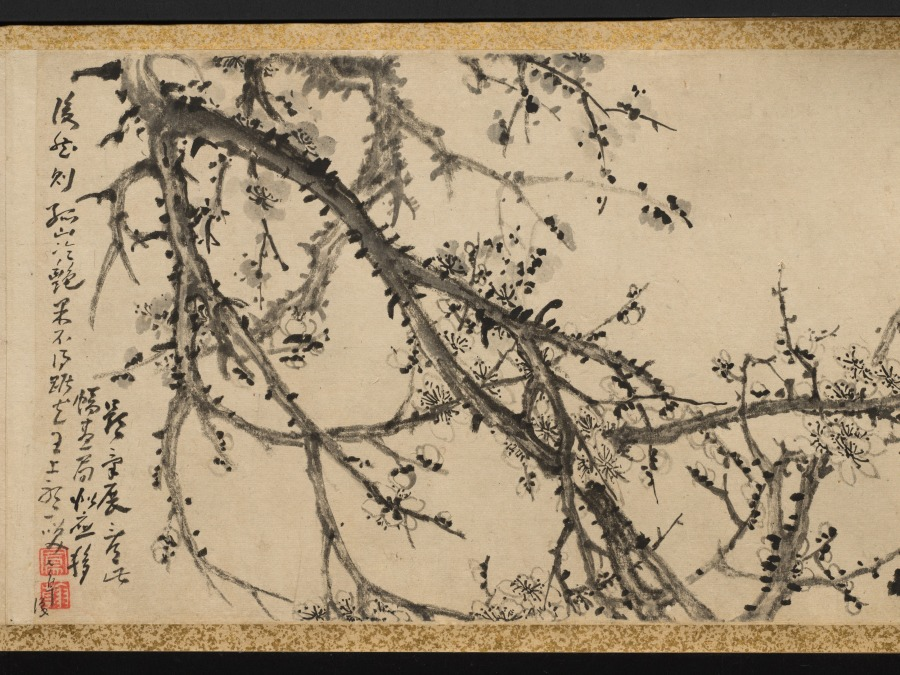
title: Plum Blossoms and Peonies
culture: China, Qing dynasty (1644-1911)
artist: Gao Fenghan (Chinese, 1683–1749)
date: 1741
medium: handscroll, ink on paper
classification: Painting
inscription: Artist's 2 inscriptions and 9 seals (the painting of Peonies with the artist's colophon and the colophon by Hou Chia-fan are on a single sheet of paper). Artist's inscription and 2 seals (Plum Blossoms): [seal] Ts'ai-yün. After finishing writing my colophon, I unrolled the painting to take another look, and it now seems that the composition here should have moved to the later part of the scroll. If that is the case, then the "Cool Beauty" [prunus] of the Solitary Hill is after all unable to take precedence over the "King of Flowers" [peony]. A laugh. Lao-fou inscribed. [seal] Feng-han. Artist's colophon (Plum Blossoms): [3 seals] Tun; Yen-yün-kung-yang, Hou-shang-tso-sheng. A few days after I painted this scroll for Shui- hsien [Yüeh Meng-yüan], the plum blossoms were in full bloom at his residence. He invited me over to enjoy them together for a long while, and I composed two additional poems and wrote them down here for his criticism. [Poems on the colophon are not translated.] First month, twenty-first day, your junior, Kao Feng-han of Nan-fou drafted this with the left hand. [seal] Feng-han. Artist's inscription and 4 seals (Peonies): Brushed with the left hand in the hsin-yu year [1741]. [seal] Yu-hsi. [3 seals at end of painting] Hou-shang-tso-sheng; Yen-yün-kung-yang; Shih-tsao-wu. Artist's colophon and seal (Peonies): The imperial concubine from the Yang family loved to dress in red, And from the emperor won the title of Hai-t'ang. But ever since she became the new dream of the moon palace, She changed into rainbow colors, while learning to dance. After I wrote the poem on Looking for Plum Blossoms in the Teng-wei Mountains, I attached to it a few branches of prunus, some bamboo tips and a piece of rock, with a scattering of green [moss] here and there to fill up the scroll. Unexpectedly, my playful fascination [with these subjects] was still not quite satisfied, so I made up these amorous ideas and romantic images [of the peony], to follow the footsteps of the fair lady of the Ku-hsieh Mountain [prunus]. Furthermore, I picked out one poem to be my vanguard. Perhaps such luminosity of wealth and power will be enough to overwhelm the poor fellows, and [they] will not mind the comparatively short length [of paper] assigned to it. Amusingly inscribed. Please correct me again. To Shui-hsien, my learned senior, your junior Han inscribed again. [seal] Tso-hua [left-handed painting]. 1 additional colophon and 5 additional seals: 1 colophon, dated 1742, and 3 seals of Hou Chia-fan (act. ca. 1742); 1 seal of P'u Ch'üan (20th c.?); 1 seal of Li family (dates unknown).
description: One of the so-called Yangzhou Eccentrics (a group of painters who lived in Yangzhou and were known for their unorthodox art and lifestyle), Gao Fenghan depicts China’s two most loved flowers in full bloom—the “cold beauty,” or plum blossom, in the first section, and the “king of flowers,” or peony, in the second section. Painted in 1741, the year when Gao decided to leave the south and return home to Shandong province in eastern China, this work was likely a token of farewell. His casual brushwork may indicate his mental and physical struggle at the time. After having crippled his right hand in 1737, Gao used his left hand to paint and achieved a crudeness and eccentric style unattainable before.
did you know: In East Asian art, peonies traditionally symbolize prosperity and wealth.